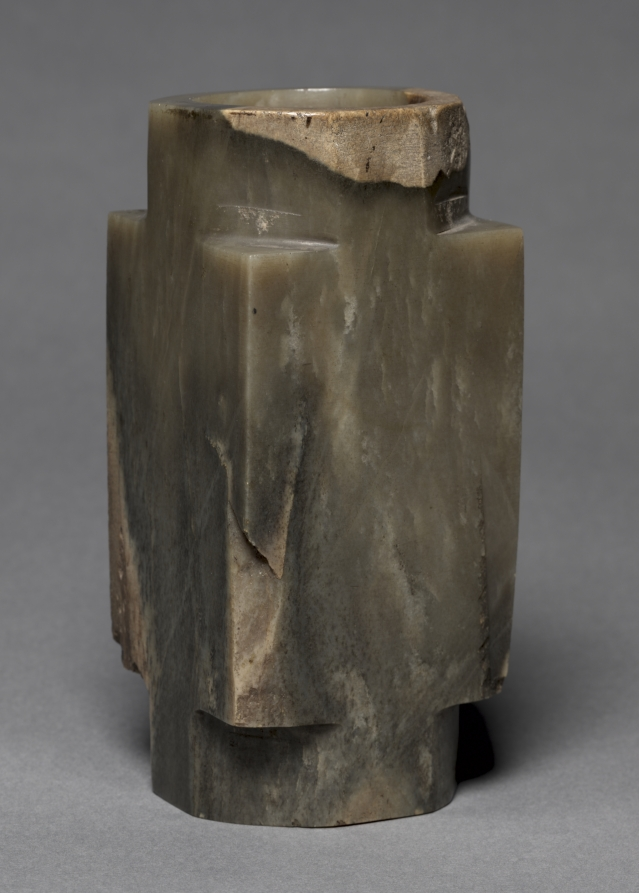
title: Ceremonial Tube (Cong)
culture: China, Shang dynasty (c. 1600–c. 1046 BCE)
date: c. 1600–1056 BCE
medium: jade (nephrite)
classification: Jade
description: The cong, a cylindrical tube with a square outer section, was one of the most impressive jade implements used in ancient rites. The ritual text Rites of Zhou mentions the use of the cong for the worship of the earth. However, its function and meaning in the earlier Neolithic societies are not completely understood.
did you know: The Interior cavity of this piece of jade was bored from both ends, making an irregular ridge near the center.